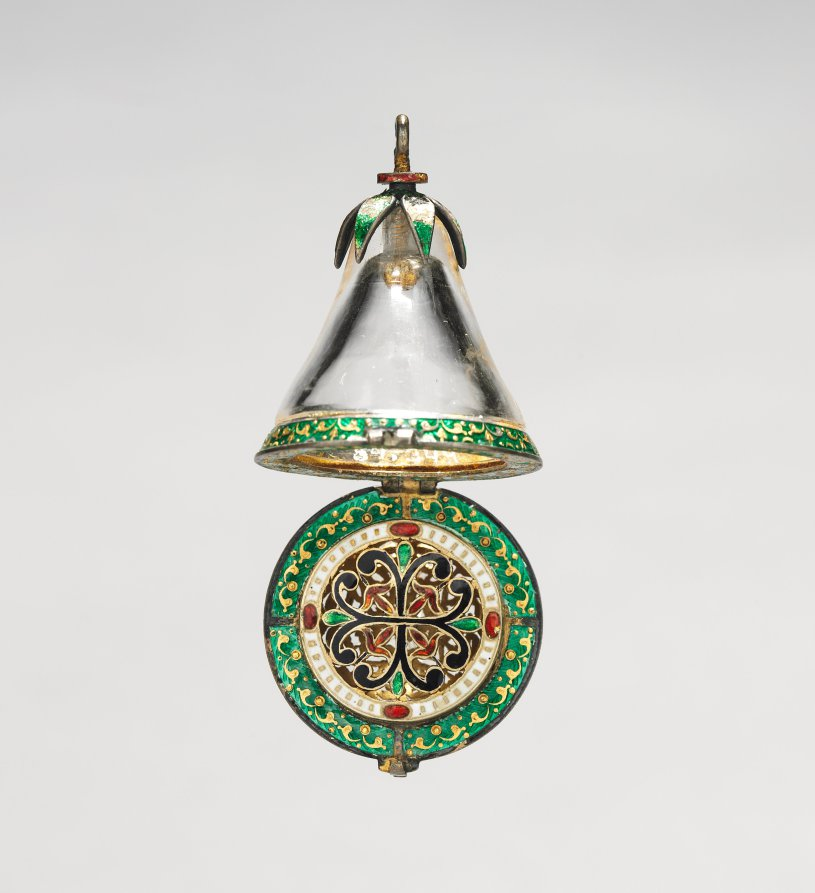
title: Pomander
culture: Mughal India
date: 1600s–1700s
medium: spherical rock crystal cover with enameled silver mounts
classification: Rock crystal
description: This tiny pear-shaped vial worn tied to a sash would have held scented water or oil. The lid opens to reveal a perforated sprinkler decorated with fine filigree and colorful enamel. A popular scent was attar of roses, made from the essential oil of rose petals.